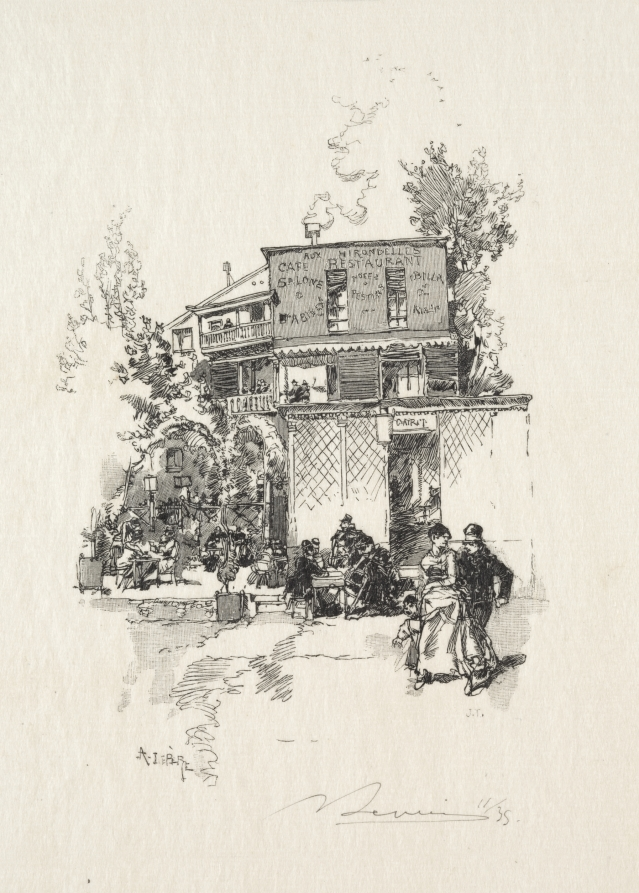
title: Une Guinguette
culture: France, 19th-20th century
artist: Auguste Louis Lepère (French, 1849–1918)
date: 1886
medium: wood engraving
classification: Print